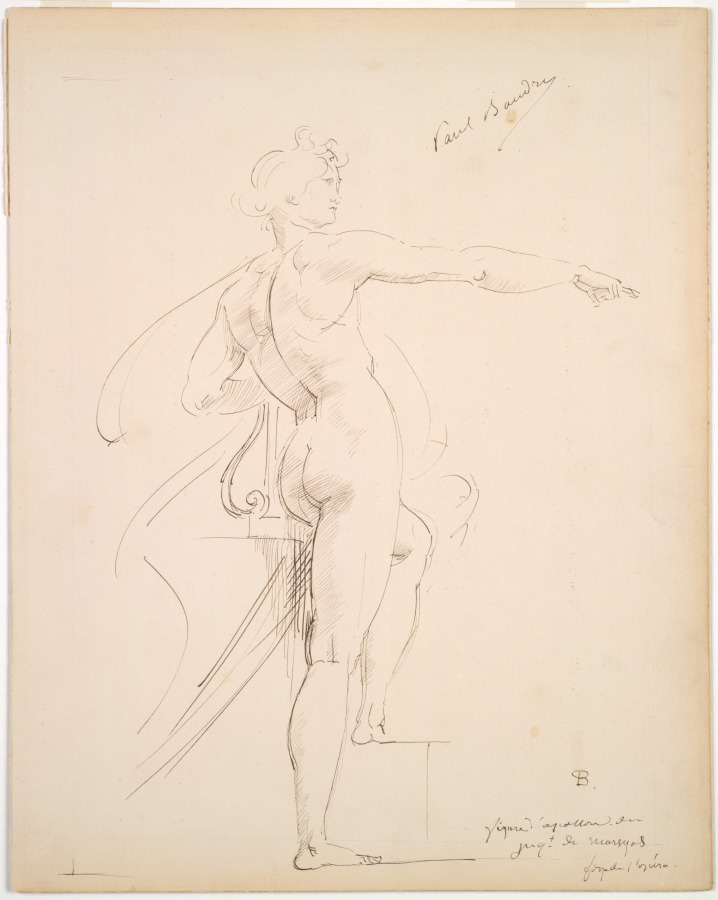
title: Study of Apollo for Marsyas (recto); Face in Profile (verso)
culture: France, 19th century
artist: Paul Baudry (French, 1828–1886)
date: late 1860s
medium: pen and brown ink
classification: Drawing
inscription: recto: Monogrammed and inscribed in brown ink, lower right: B / figure d'Apollon du / jugt de Marsyas / foyer de l'opéra. Signed in brown ink, upper right center: Paul Baudry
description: When Paul-Jacques-Aimé Baudry was commissioned to create the ceiling paintings for the Grand Foyer of the new Paris Opéra in 1864, for inspiration he visited the Sistine Chapel frescoes by Michelangelo—completed more than 300 years earlier. This drawing depicts the god Apollo from behind, intended for a scene in which Apollo points to the satyr Marsyas, with whom he held a musical competition. The pose and figure type recall Michelangelo’s monumental sculpture of David, which Baudry would have also seen on his Italian journey.